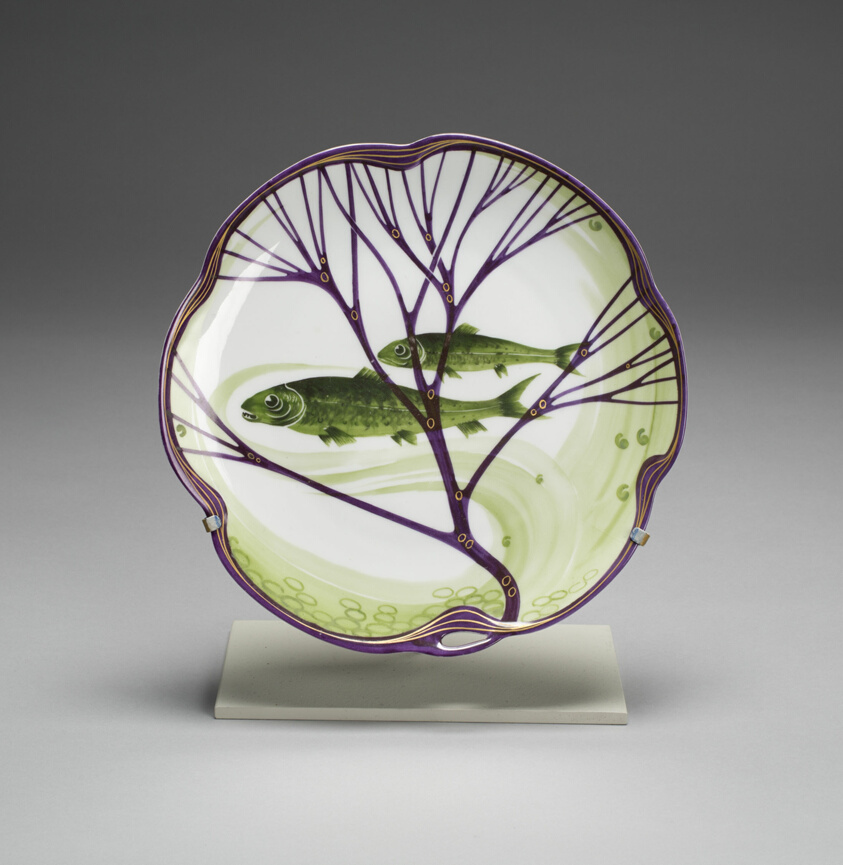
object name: Ceramics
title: Plate from the Fish Service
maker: Designed by Hermann Gradl; German, 1869-1934; Made by Königlich-Bayerische Porzellan-Manufaktur; Nymphenburg, Germany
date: 1899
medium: Hard-paste porcelain with polychrome enamels and gilding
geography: Germany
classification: plate (general, dish); tableware; dish (vessel); ceramics; porcelain; european decorative arts